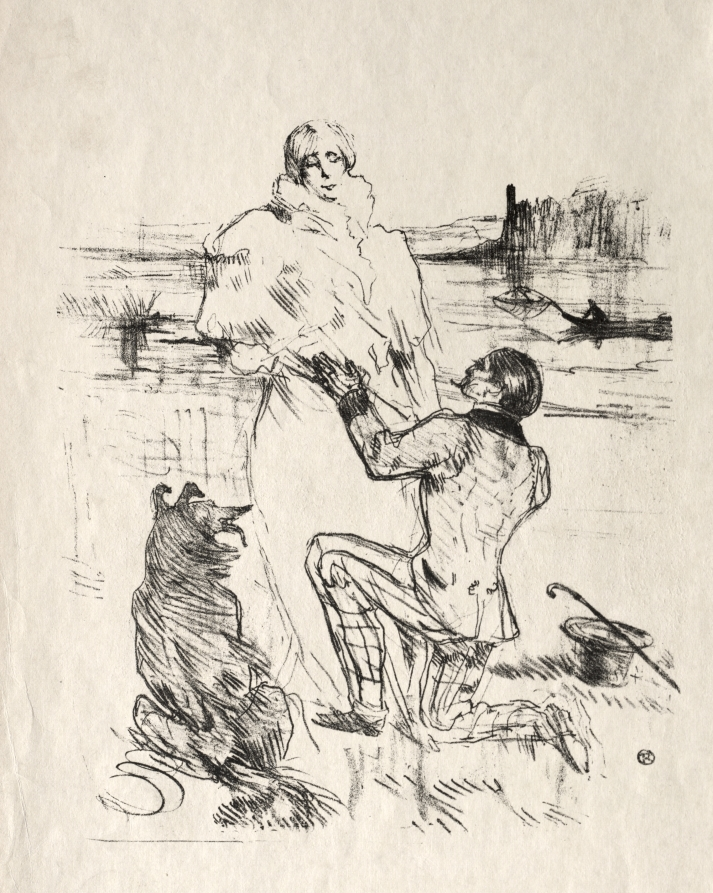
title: Déclaration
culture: France, 19th century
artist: Henri de Toulouse-Lautrec (French, 1864–1901)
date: 1900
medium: lithograph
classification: Print